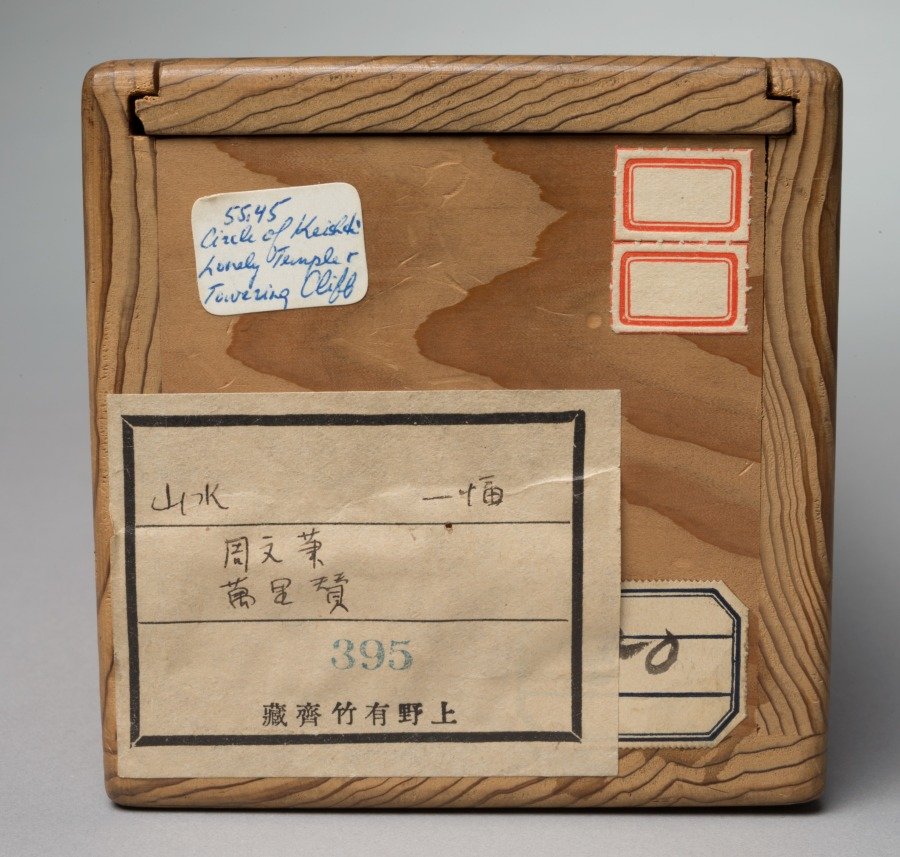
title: Lonely Temple and Towering Cliff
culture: Japan, Muromachi period (1392–1573)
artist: circle of Kenkō Shōkei (Japanese, active 1478–1506)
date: c. 1480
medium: hanging scroll; ink and slight color on paper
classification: Painting